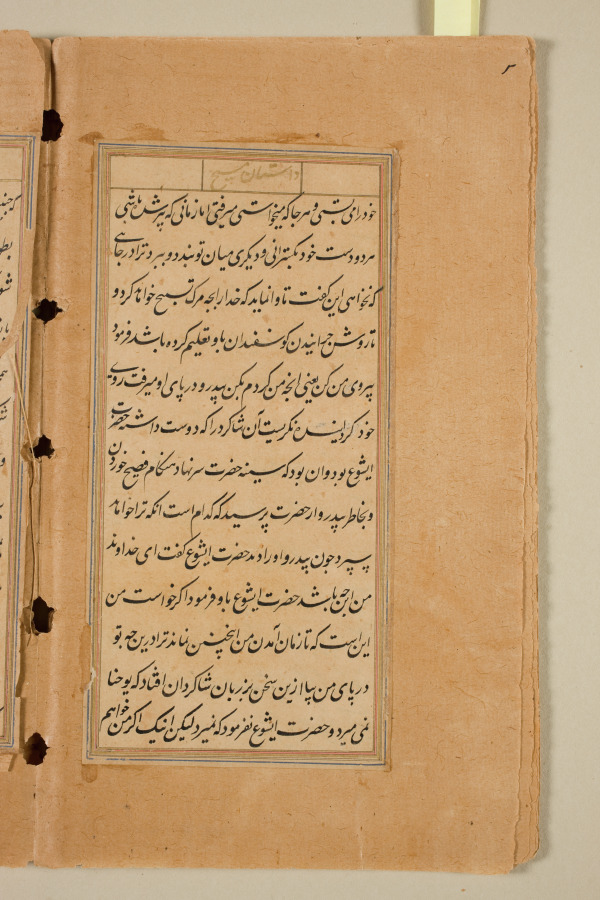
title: Text page from a Mirror of Holiness (Mir’at al-quds) of Father Jerome Xavier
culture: Mughal India, Allahabad, made for Prince Salim (1569–1627)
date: 1602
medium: Ink and gold on paper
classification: Manuscript